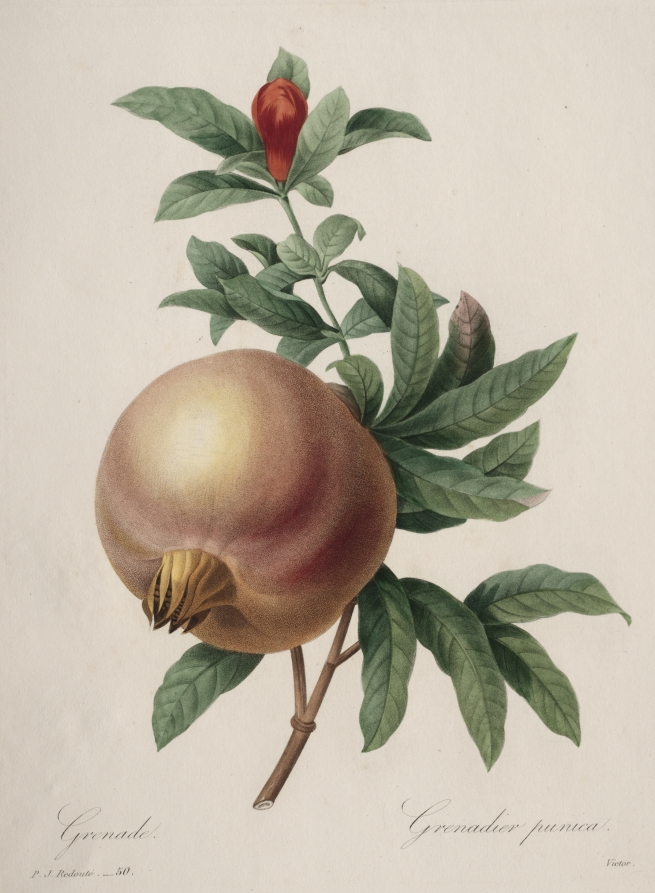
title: Choix des plus belles fleurs...plus beaux fruits: Grenade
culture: France, 19th century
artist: Henri Joseph Redouté (French, 1766–1853)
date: 1827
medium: stipple and line engraving, with hand coloring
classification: Print